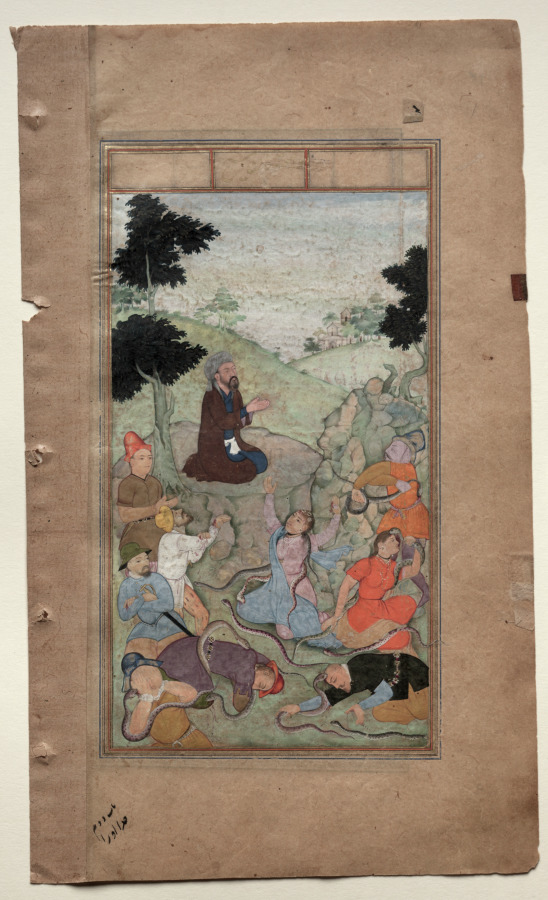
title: Moses praying to end the serpents’ attack on the Israelites (folio 63 verso), from a Mirror of Holiness (Mir’at al-quds) of Father Jerome Xavier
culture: Mughal India, Allahabad, made for Prince Salim (1569–1627)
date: 1602–4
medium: Gum tempera, ink, color, and gold on paper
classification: Manuscript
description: After the Israelites complained about the difficulties of their journey out of Egypt, God punished them for their lack of gratitude by sending snakes to bite and plague them. Apparently reveling in the brutality of the scene, the artist shows men and women alike being savaged by snakes, one of whose tail slithers over the rulings of the right margin. An Israelite woman raises her hands and pleads with Moses to help them, promising repentance, and he intercedes on their behalf. Father Jerome used this episode to demonstrate how repentant believers merit salvation.